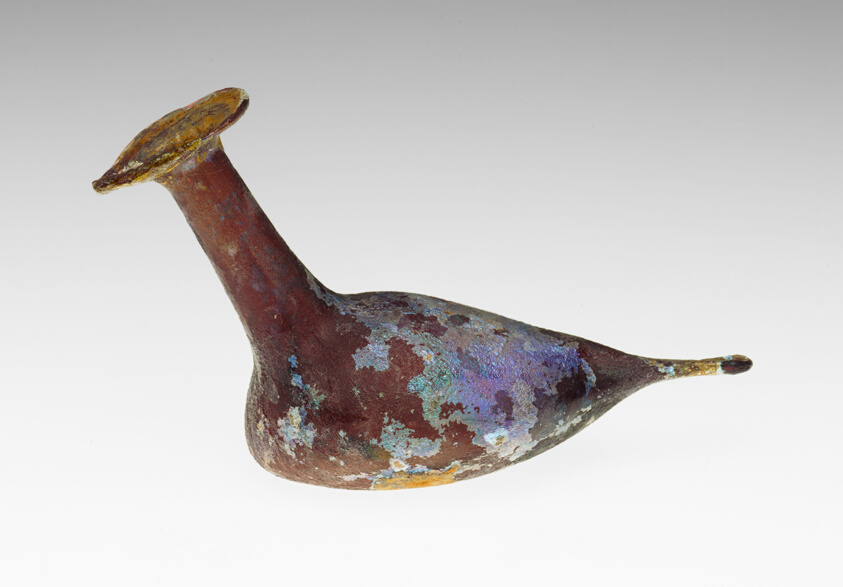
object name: Vessel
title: Bottle in the Shape of a Bird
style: imperial (roman), ancient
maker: Roman; Eastern Mediterranean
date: 1st-early 2nd century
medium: Glass, blown technique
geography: Mediterranean Region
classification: bottle; glass; vessel; ancient art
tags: animals